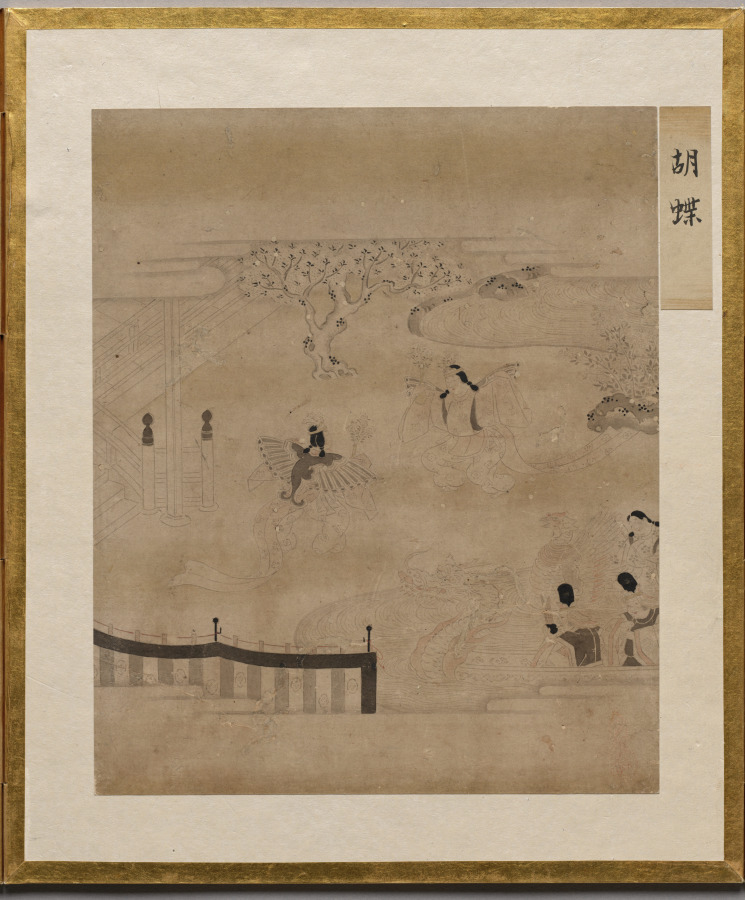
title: Butterflies from Album of Illustrations for the Tale of Genji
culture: Japan, Edo period (1615–1868)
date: 1600s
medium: painting in an accordion-style album; ink, light color, and gold on paper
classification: Bound Volume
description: This album contains illustrations for the classic literary work the Tale of Genji, authored in the 1000s by Murasaki Shikibu, an aristocrat of the Heian period (794–1185) court. The scenes are painted in the “white drawing” (hakubyō) mode, in which a fine ink line is used to depict figures and spaces with great subtlety, punctuated only occasionally by traces of red pigment for a character’s lips, a detail of a garment, or a decorative element. These two scenes illustrate episodes from the chapters “Thin Veil of Cloud” (Usugumo) and “Barrier Gate” (Sekiya).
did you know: The illustrations are identified by chapter title in cartouches to the upper right of the paintings.